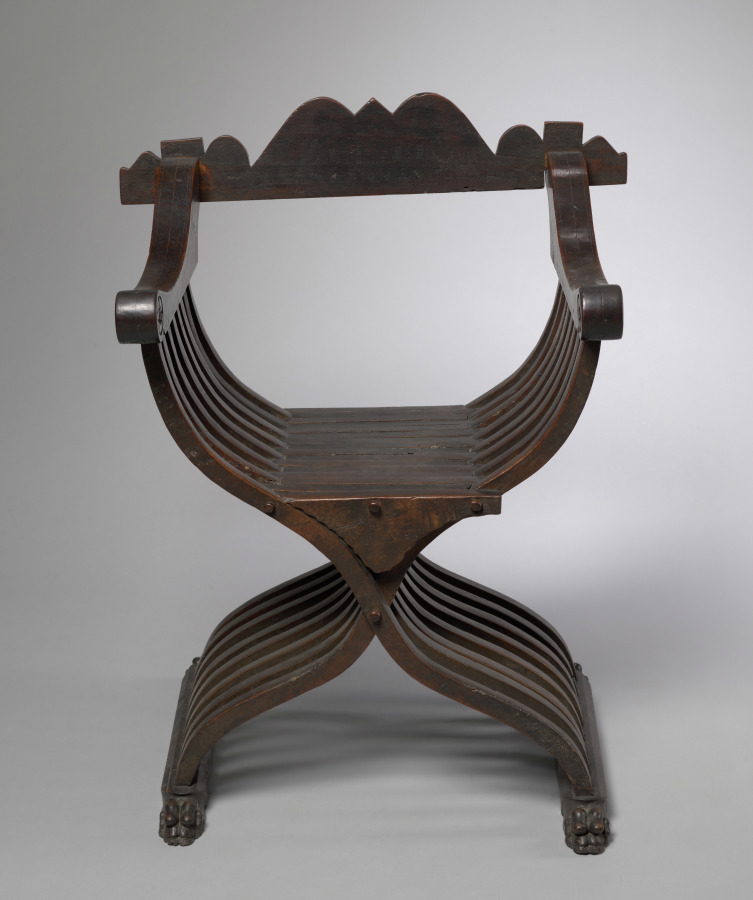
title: Folding Armchair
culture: Italy, early 16th century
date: early 1500s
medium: walnut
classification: Furniture and woodwork